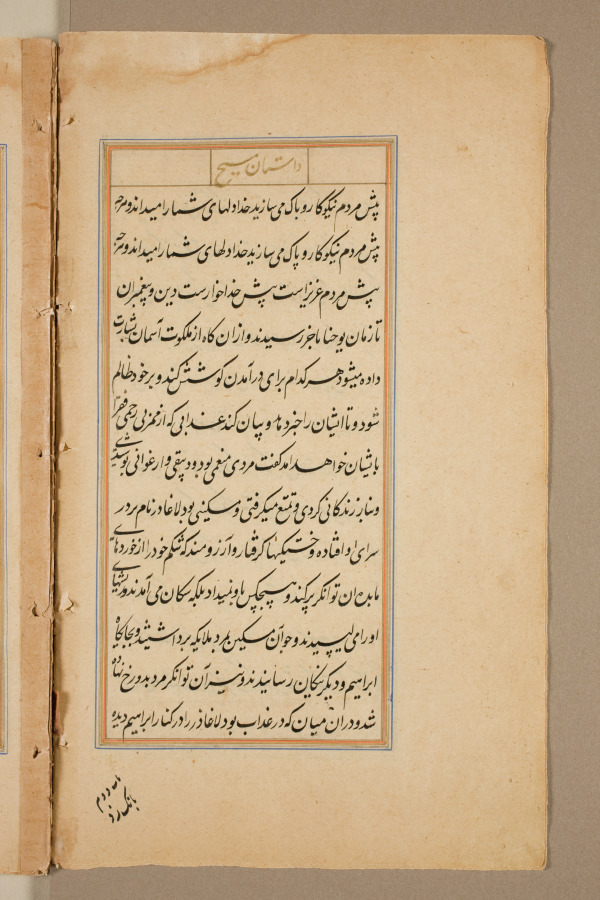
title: Text page from a Mirror of Holiness (Mir’at al-quds) of Father Jerome Xavier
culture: Mughal India, Allahabad, made for Prince Salim (1569–1627)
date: 1602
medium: Ink and gold on paper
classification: Manuscript